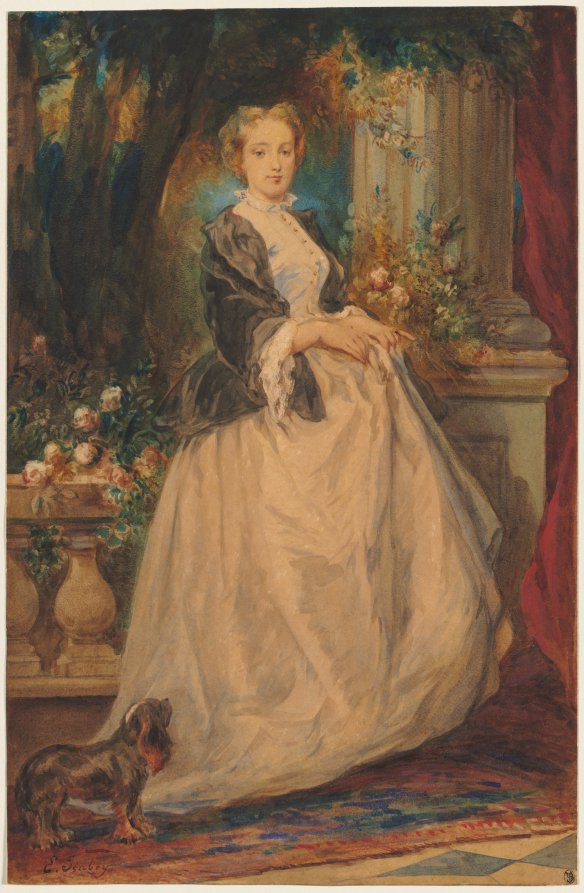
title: Portrait of Madame Thomas (née Camille Boucher)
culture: France, 19th century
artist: Eugène Isabey (French, 1803–1886)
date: c. 1824–86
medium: watercolor with graphite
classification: Drawing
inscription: inscribed in black ink, lower left: "E. Isabey"